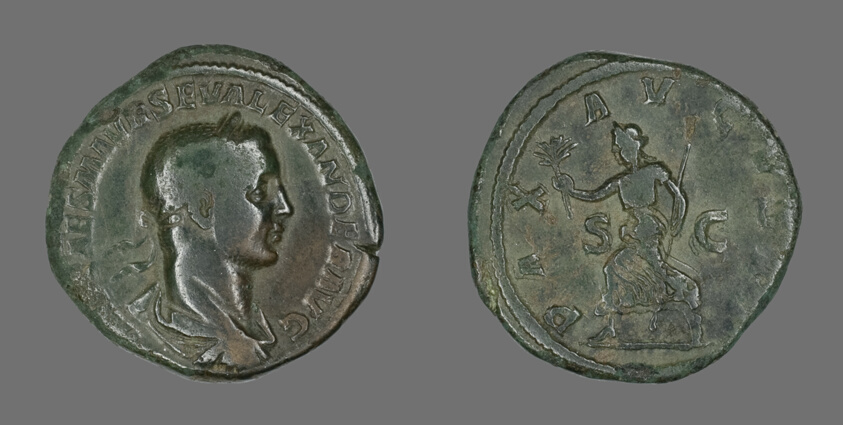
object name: Coin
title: Sestertius (Coin) Portraying Emperor Severus Alexander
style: roman (ancient, style or period)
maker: Roman, minted in Rome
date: 222-235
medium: Bronze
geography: Roman Empire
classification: coin; ancient art